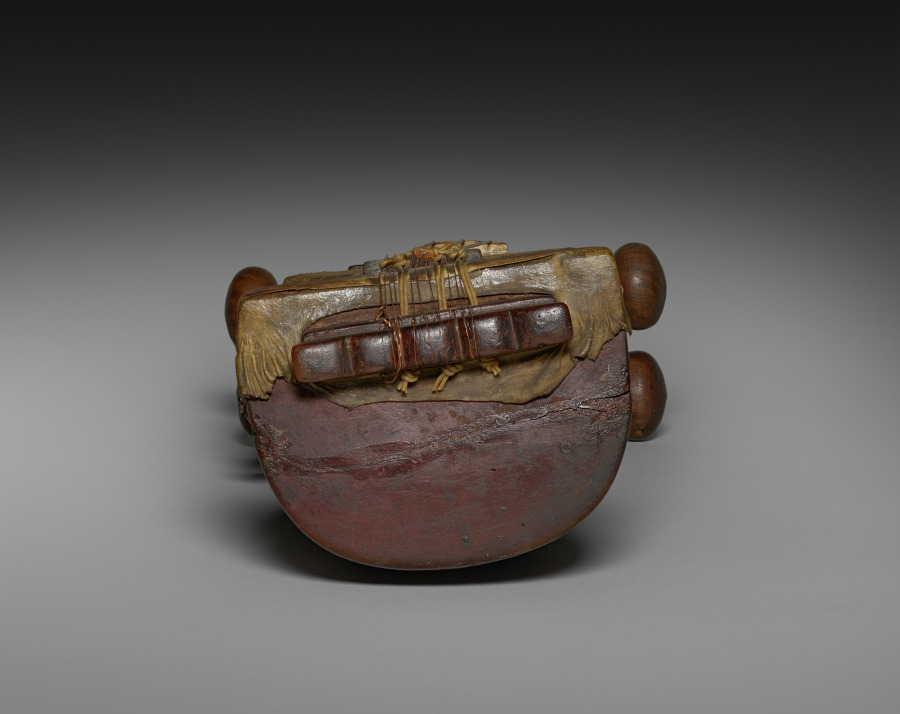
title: Sarangi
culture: East India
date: c. 1850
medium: Wood, parchment, bone or ivory, gut, and copper strings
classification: Musical Instrument